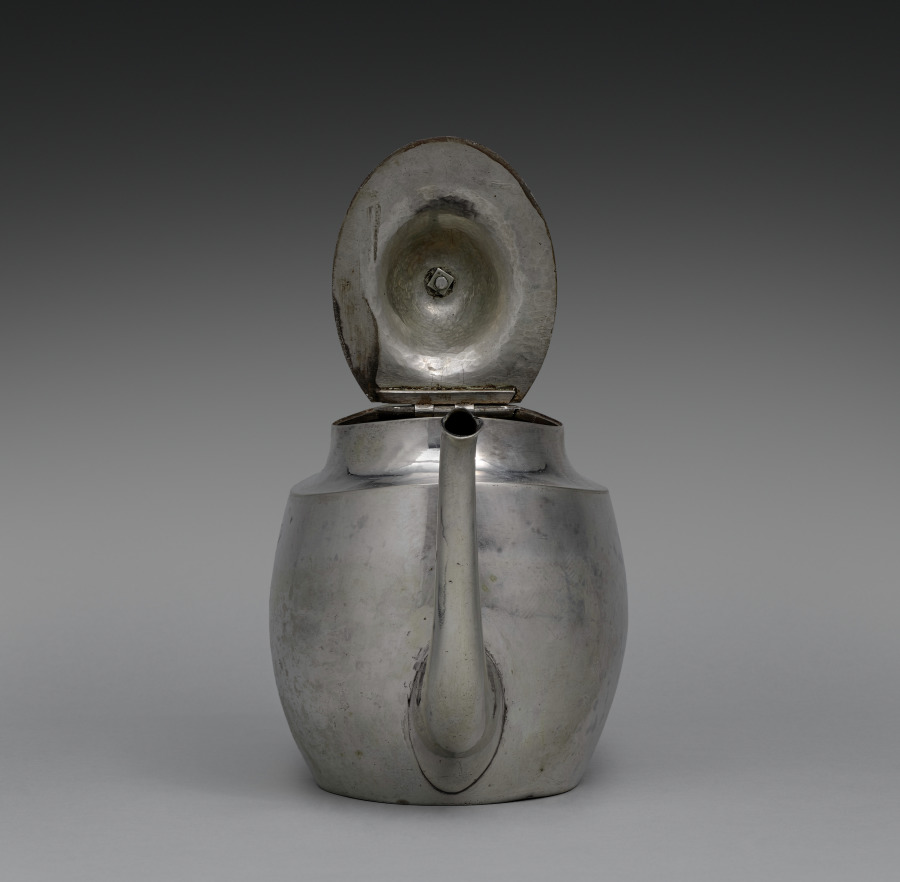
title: Teapot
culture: America, early 19th Century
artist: firm of Henry Farnam (American, 1773–1833)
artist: firm of Rufus Farnam (American, 1771-)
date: c. 1800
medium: silver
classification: Silver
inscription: engraved "AW/to/AW" in bright-cut script on side.